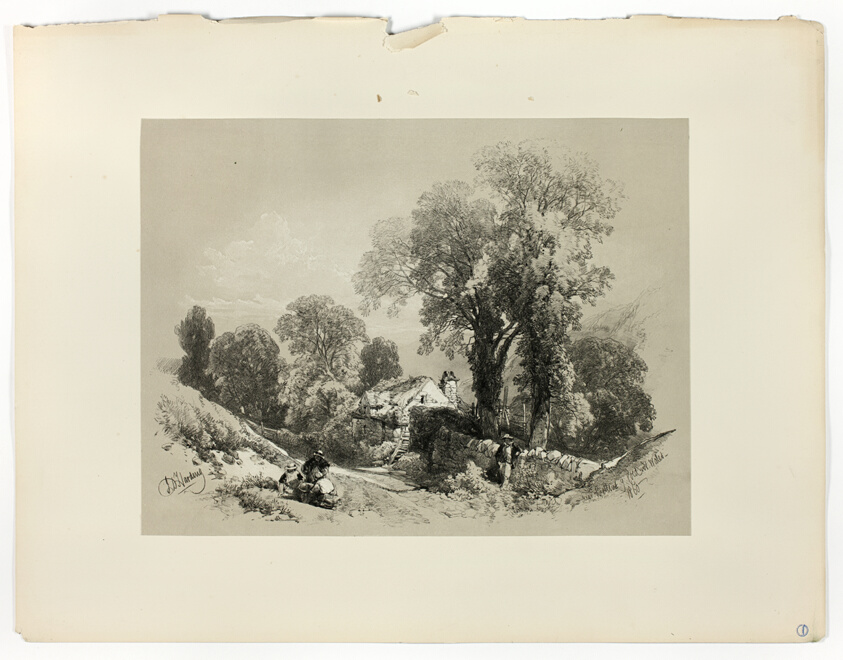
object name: Print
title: Near Bettws y Coed, N. Wales, from Picturesque Selections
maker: James Duffield Harding, (English, 1798-1863); Published by W. Kent and Co.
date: 1860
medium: Lithograph on paper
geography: England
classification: lithograph; print; prints and drawing